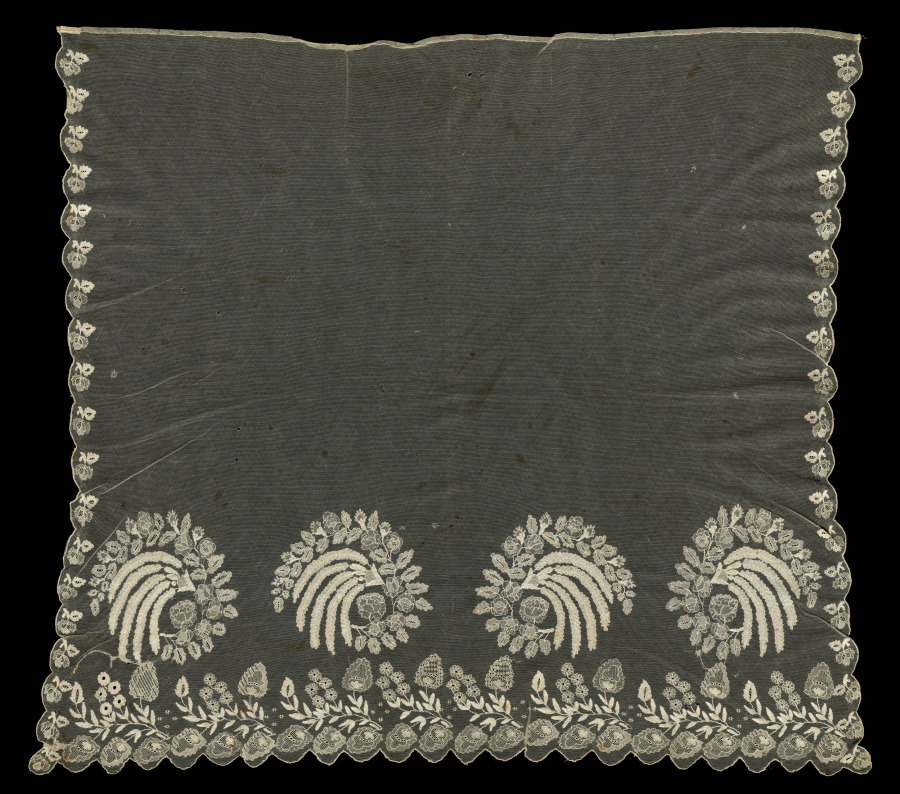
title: Lace Bonnet Veil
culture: America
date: 1830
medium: Machine-made lace net: embroidered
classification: Lace